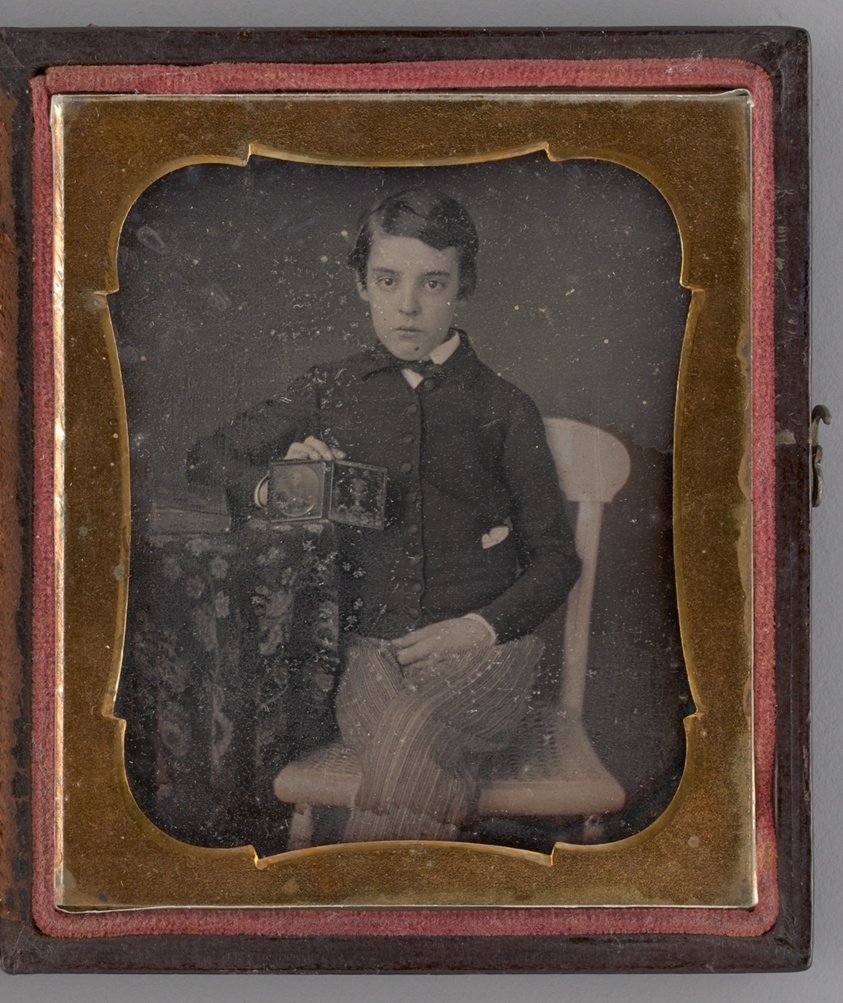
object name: Photograph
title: Untitled (Portrait of a Seated Boy)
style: 19th century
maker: Unknown maker; American, 19th century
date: 1847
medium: Daguerreotype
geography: United States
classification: portrait; daguerreotype; portrait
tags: lundberg collection, portraits: male subject, portraits: child subject, portraits, portrait, photography, Male, boys